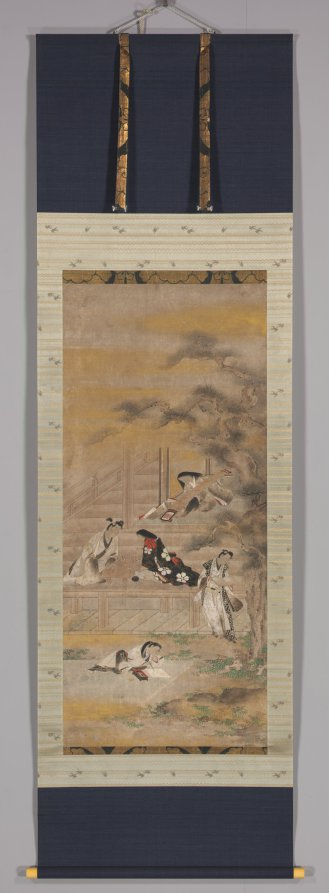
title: The Four Accomplishments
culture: Japan, Edo period (1615–1868)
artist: attributed to Iwasa Matabei (Japanese, 1578–1650)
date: c. 1620–50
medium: Hanging scroll; ink, color, and gold on paper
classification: Painting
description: This painting shows a woman playing a koto, a type of stringed instrument; a pair playing a board game called Go; a man deep in a book; and a boy painting an image of flowers. The group of fashionably dressed figures is set in and around a cozy residence, their poses conveying a sense of carefree pleasure. The scene is a playful response to a theme derived from Chinese culture that presents four notable pastimes of well-educated people.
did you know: The small, golden jar holds water to mix with the youth's ink for his painting.